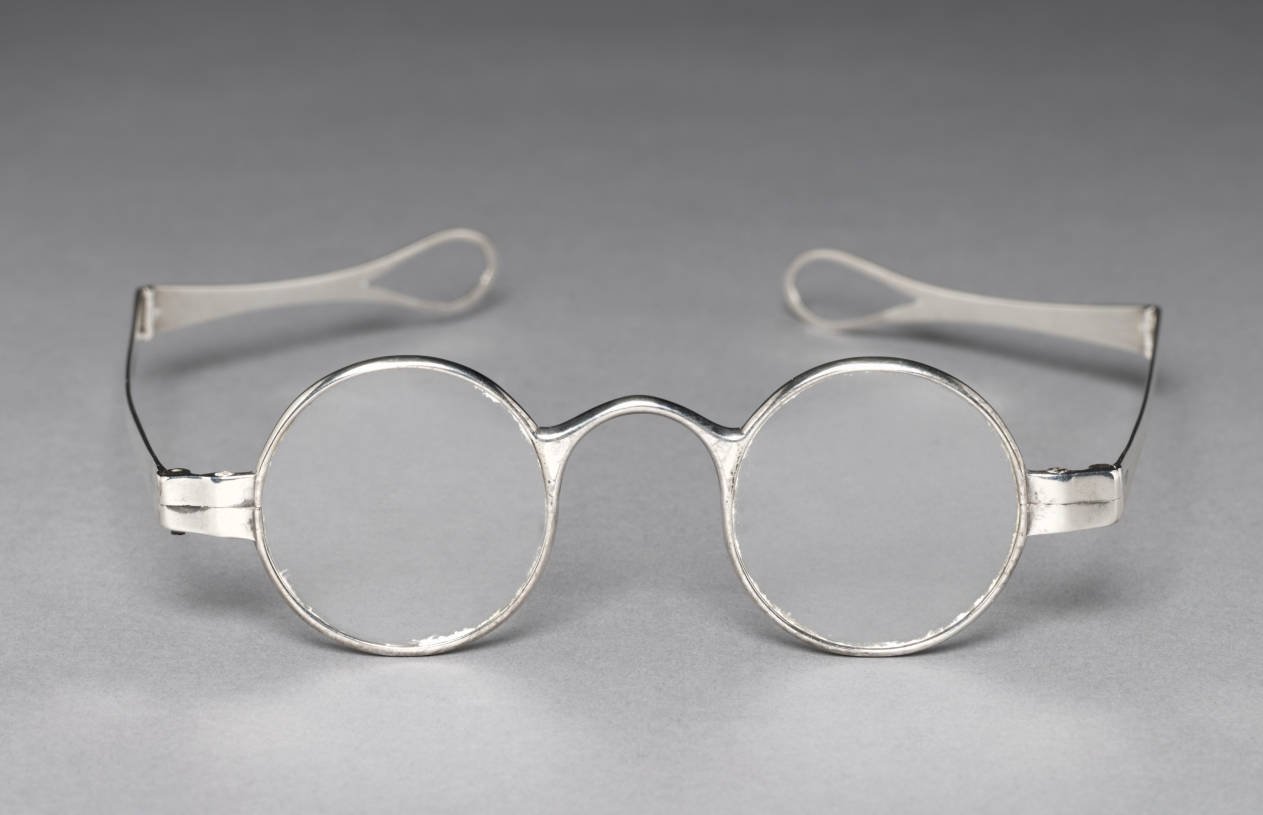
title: Spectacles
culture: America, Massachusetts, Boston, 19th century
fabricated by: John Peirce (American)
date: c. 1816–1820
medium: silver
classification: Silver